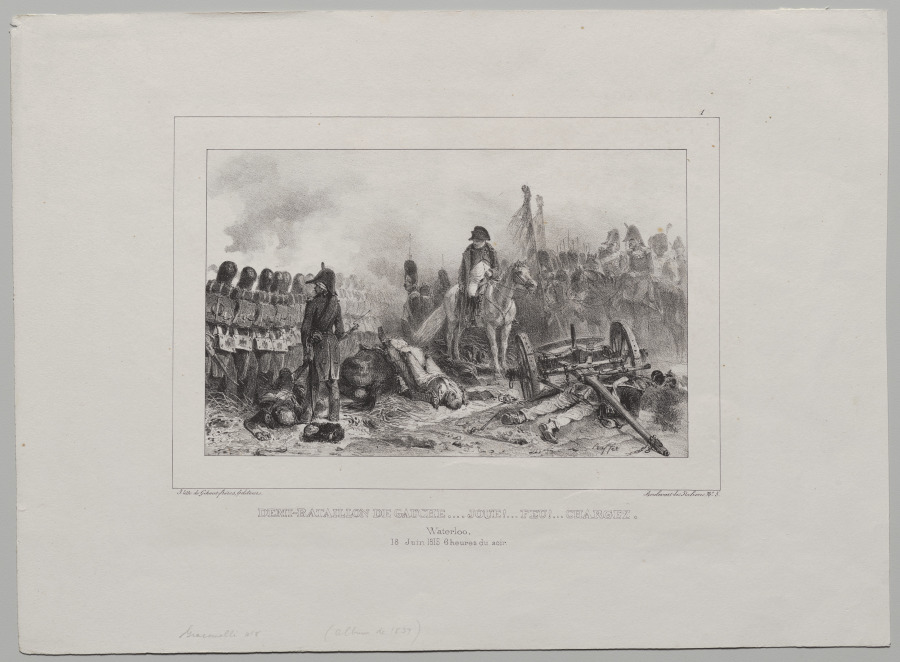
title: Lithographic Album of 1837: Half-Battalion at Left…Aim!...Fire!...Load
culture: France, 19th century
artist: Auguste Raffet (French, 1804–1860)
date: 1836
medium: lithograph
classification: Print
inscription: inscribed lower margin, center, in stone: "Waterloo,/ 18 Juin 1815 6 heures du soir"